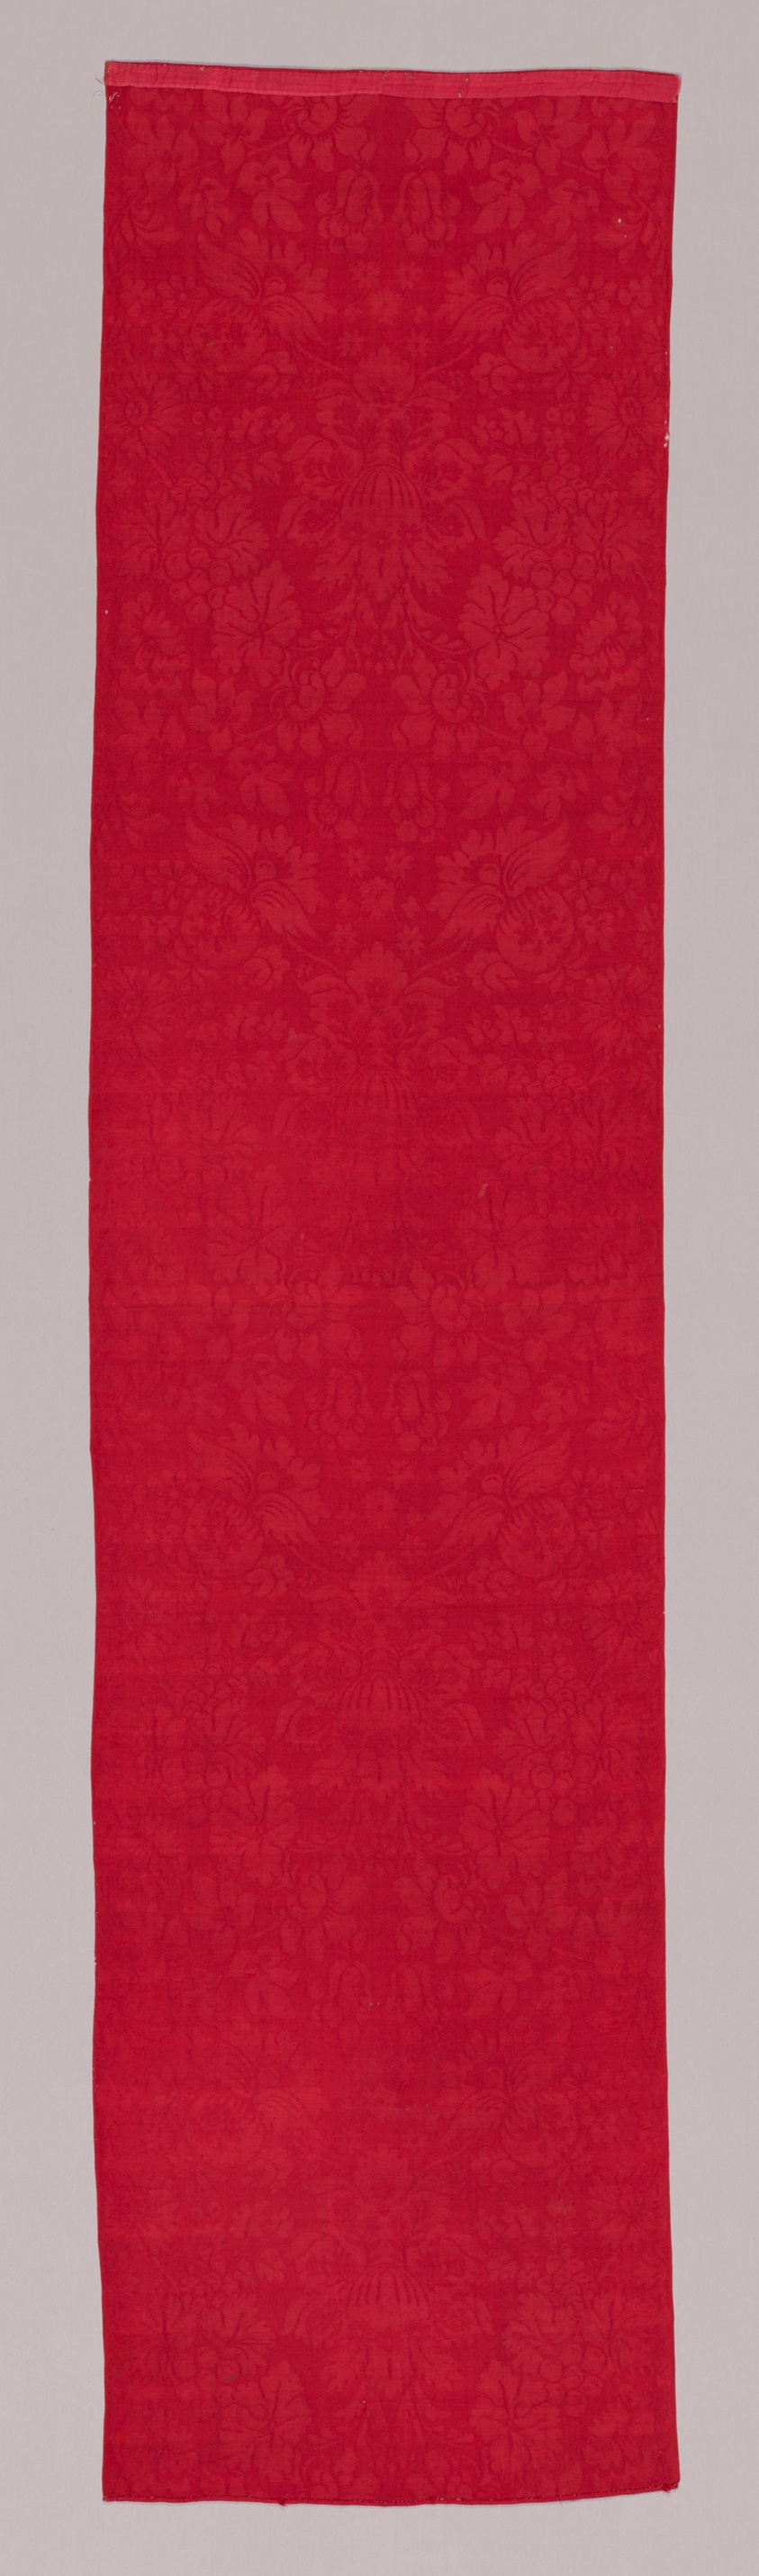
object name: Textile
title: Panel of Wool Furnishing Damask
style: 18th Century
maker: England, Norwich or Spitalfields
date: 1740-80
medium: Wool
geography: England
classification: weaving; textile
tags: floral motifs